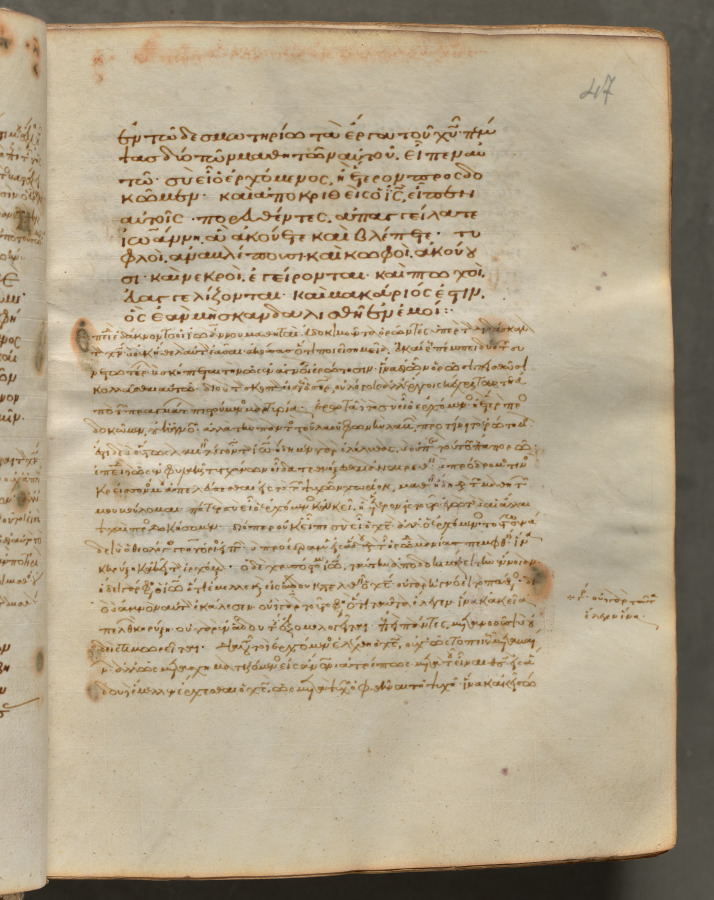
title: Text, folio 47 (recto), from a Gospel Book with Commentaries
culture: Byzantium, Constantinople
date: c. 1000–1100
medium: ink, tempera, and gold on vellum; leather binding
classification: Bound Volume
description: Each of the four gospels in this book opens on a page with brilliantly illuminated borders depicting the author of the text as well as birds-principally peacocks, symbols of the immortality of the soul-and fountains, representing the fountain of life and the salvation of the soul. This volume consists of 428 leaves with texts in Greek. Its level of sophistication suggests that it was probably written and decorated in a monastery in Constantinople.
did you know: Gospel Books were carried in procession through Byzantine churches.